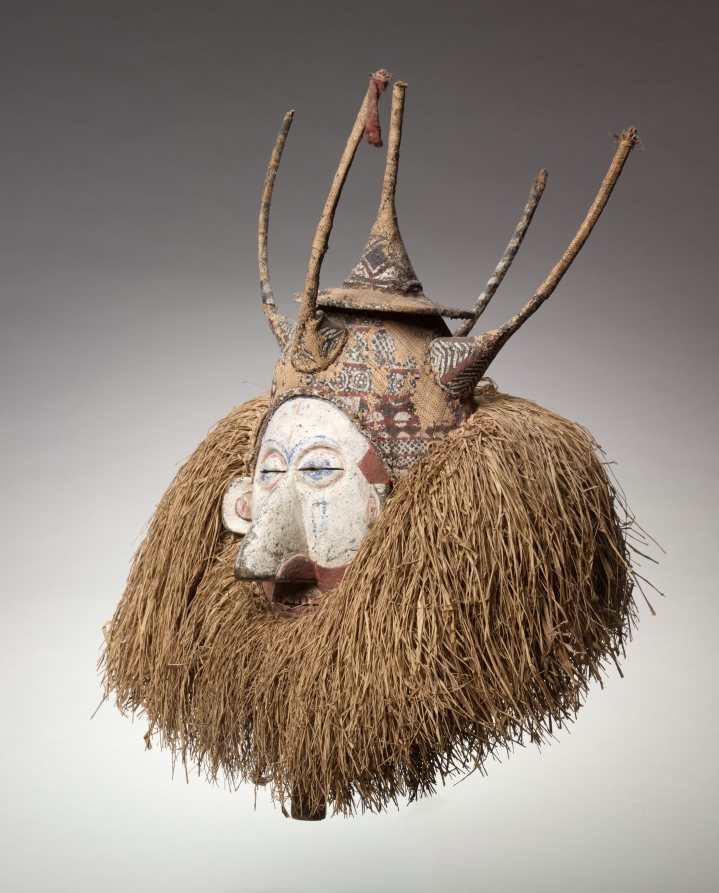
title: Mask (ndeemba)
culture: Africa, Central Africa, Democratic Republic of Congo, Yaka-style carver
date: early 1900s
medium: Wood, raffia, paint, and cotton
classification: Mask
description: This Mask (Ndeemba) has been featured prominently in the African galleries since making its debut at the Cleveland Museum of Art in 1962. Dated to the 1900s, the object is part of a group of eight masks that appear at the end of the circumcision and puberty ritual (n-khanda) for Yaka boys. It would have marked the new status of the boys who became men and commemorated their re-entry into the village. Affirming age-long tradition, such masks are worn by the master of the initiation or by the newly initiated himself.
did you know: Look under the fluffy layers of raffia fiber to see the handle; this mask was "worn" by holding it up to the face.